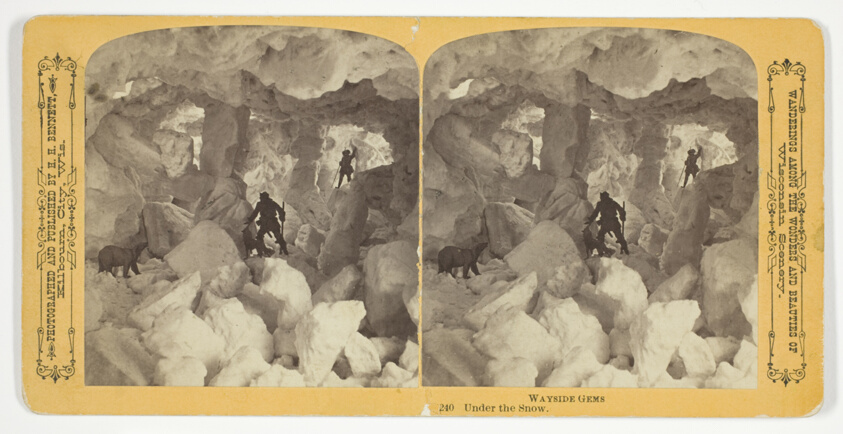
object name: Photograph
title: Under the Snow, No. 240 from the series "Wayside Gems"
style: 19th century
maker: Henry Hamilton Bennett (American, born Canada, 1843-1908)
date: 1870/89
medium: Albumen print, stereo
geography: Wisconsin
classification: photography; photograph; albumen silver print; stereograph (albumen)